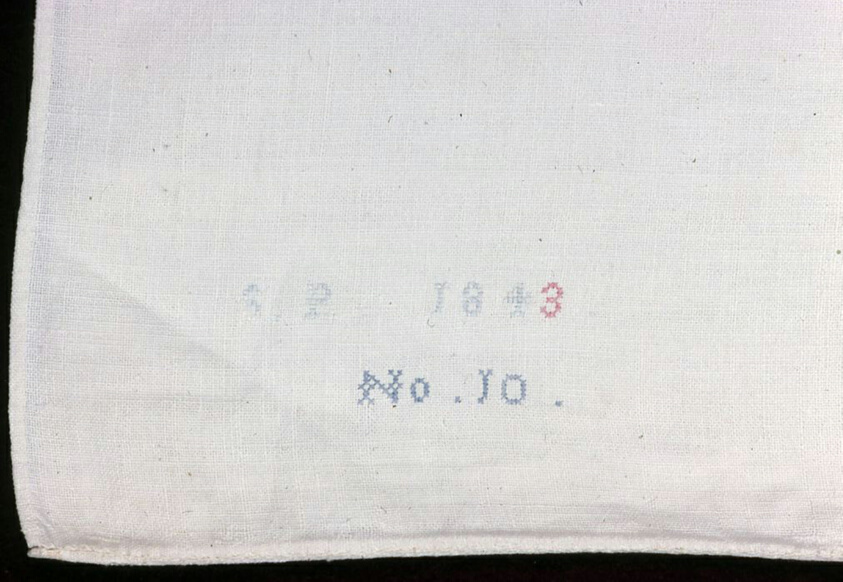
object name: Textile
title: Sheet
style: 19th century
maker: United States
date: 1843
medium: Linen, plain weave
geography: United States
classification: weaving; textile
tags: numbers, dates